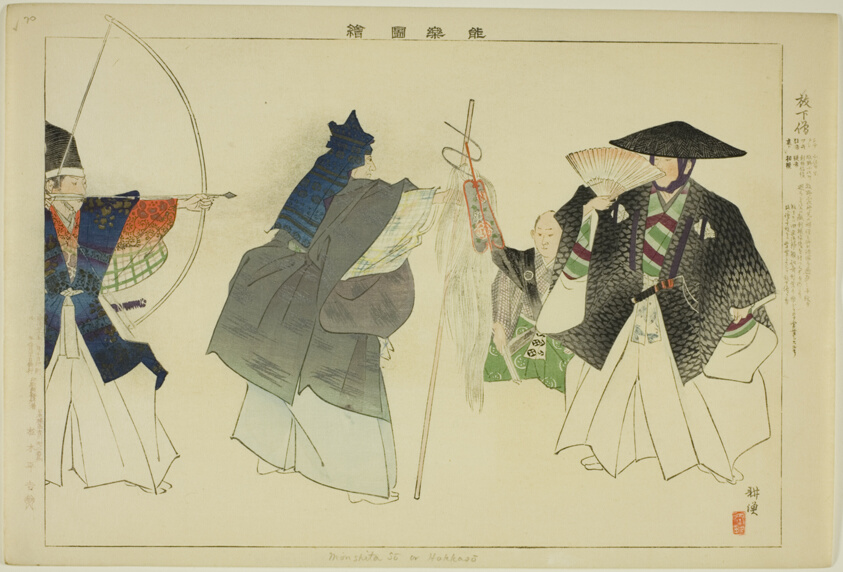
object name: Print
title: Hoka-zo, from the series "Pictures of No Performances (Nogaku Zue)"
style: Japanese (culture or style)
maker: Tsukioka Kogyo; Japanese, 1869-1927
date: 1898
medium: Color woodblock print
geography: Japan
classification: woodblock print; print; asian art